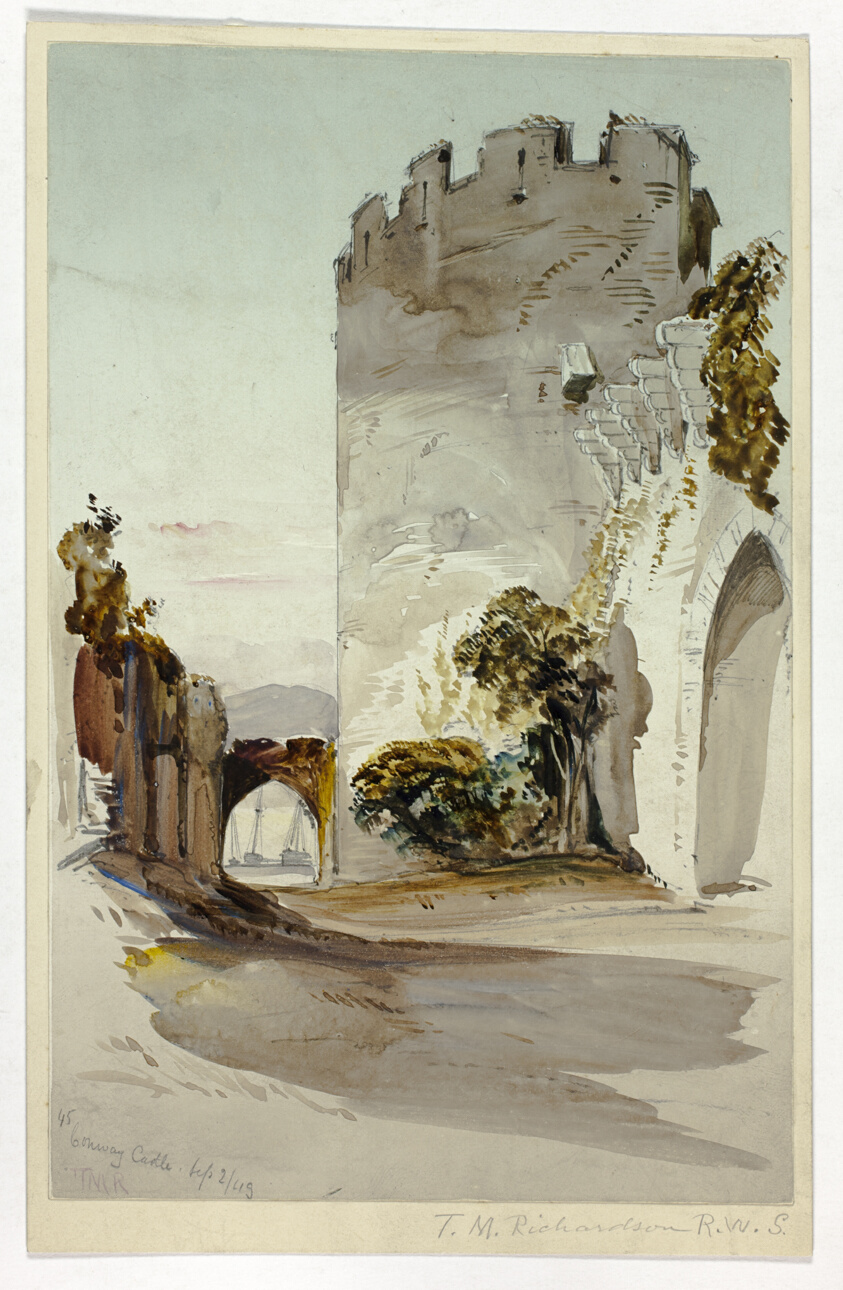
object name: Drawing and Watercolor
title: Conway Castle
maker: Thomas Miles Richardson, the younger (English, 1813-1890)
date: 1849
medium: Watercolor, over graphite, on ivory wove paper, laid down on cream card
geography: England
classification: watercolor; drawings (visual works); prints and drawing